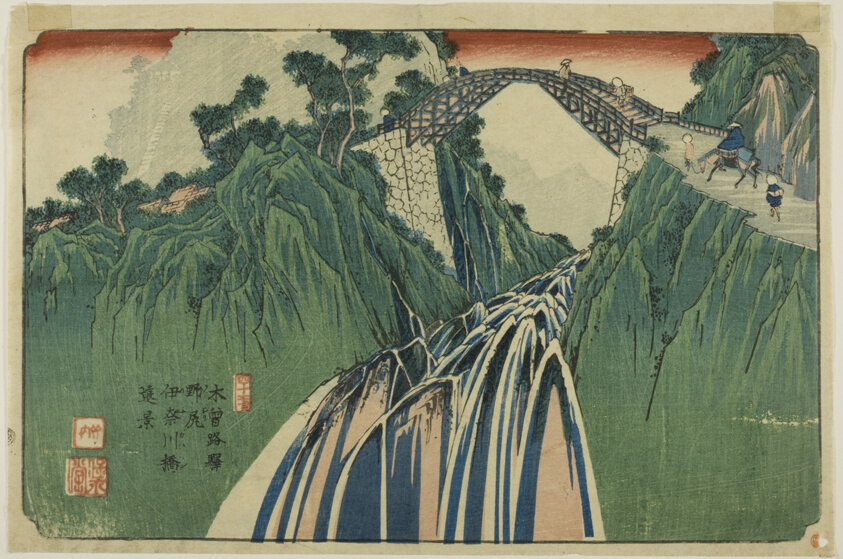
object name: Print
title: No. 41: Distant View of the Ina River Bridge at Nojiri (Yonjuichi: Noriji Inagawabashi enkei), from the series "[Sixty-nine Stations of the] Kisokaido"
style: Japanese (culture or style)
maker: Keisai Eisen (Japanese, 1790-1848)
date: c. 1835/36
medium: Color woodblock print; oban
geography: Japan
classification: woodblock print; print